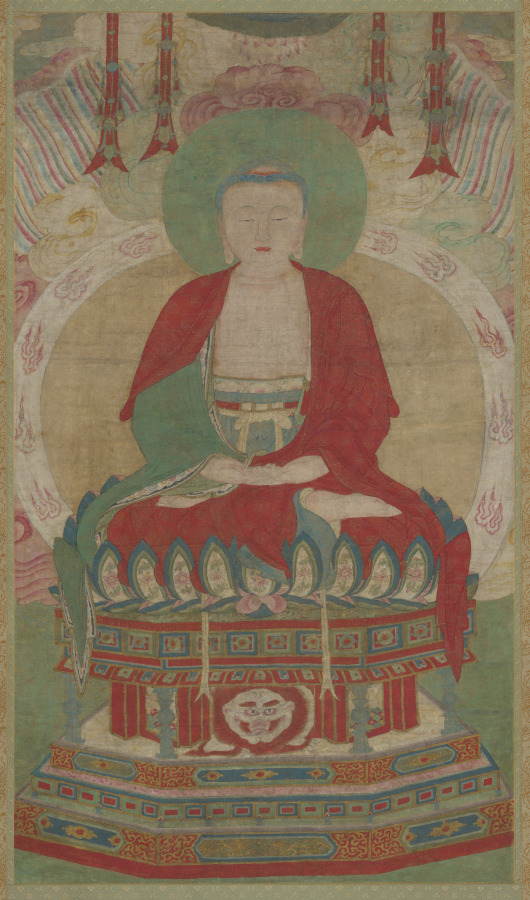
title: Seated Amitābha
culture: Chinese, Ming dynasty (1368-1644)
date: late 1500s–early 1600s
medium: hanging scroll; ink and color on silk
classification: Painting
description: This magnificent Buddha, called Amitābha (literally, “infinite light”) is seated on a lotus pedestal with both palms facing up over crossed legs, suggesting that it is in deep meditation. In contrast to the richly ornamented throne on which the Buddha is seated, the figure itself is devoid of any jewelry or decorative attributes, emphasizing its enlightened status and detachment from worldly affairs. The lion head in the center of the pedestal is a motif from Central Asia, which can also be seen in the halo or nimbus of Chinese Buddhist stone steles.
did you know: Originally, this scroll was acquired by the museum as a Korean work, but has now been tentatively reattributed as Ming period Chinese.